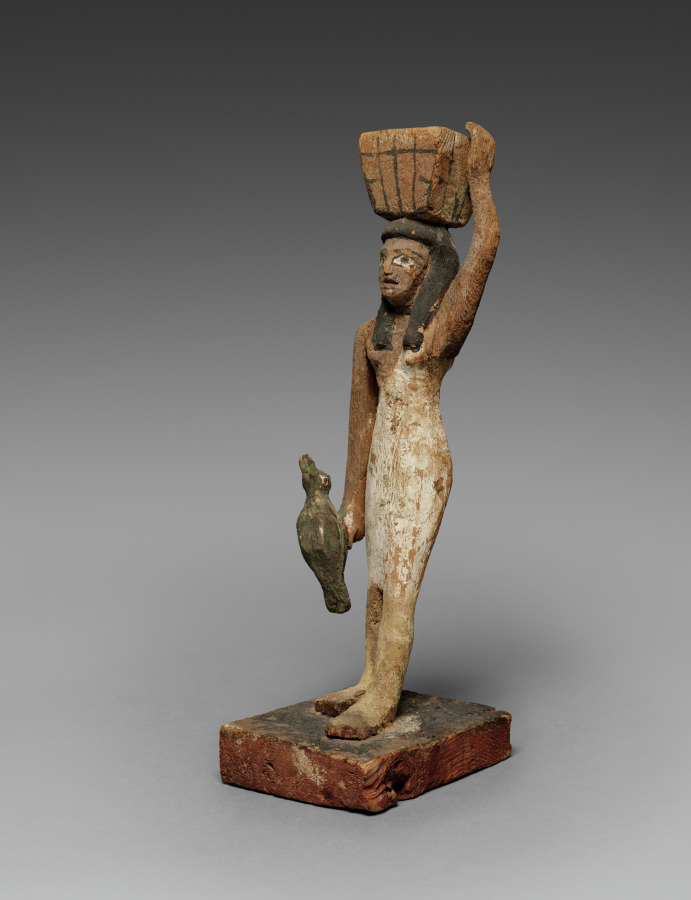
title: Female Offering Bearer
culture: Egypt, Middle Kingdom (2040–1648 BCE), Dynasties 11–12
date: 2000–1801 BCE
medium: painted wood, figure of tamarisk(?), base of sycamore fig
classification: Wood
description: The offering bearer wears a basic wraparound kalasiris dress and a strap that connects to the dress over her left shoulder. It is not known whether straps on ancient Egyptian dresses were designed as a part of the garment or were separate attachments for fashionable or utilitarian purposes. Ancient Egyptian illustrations typically identify women who wore this garment with a strap as servants, whereas artisans depicted men of all socioeconomic levels wearing the version for men.